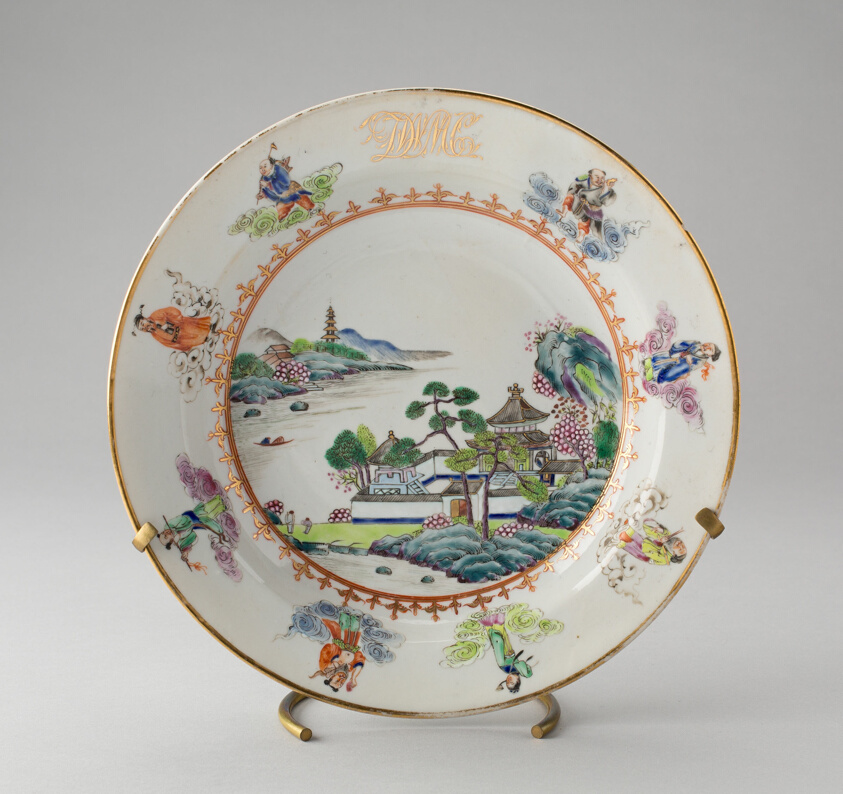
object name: Ceramics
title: Dinner Plate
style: Chinese (culture or style), 18th Century, 19th century, asian, chinese export, East Asian, jiajing, qianlong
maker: China, Qianlong or Jiaqing reign; Chinese, made for the American market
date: 1796–1810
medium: Hard-paste porcelain, glaze, with enamels in colors, and gilding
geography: China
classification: plate (general, dish); porcelain; dish (vessel); American market; chinese export porcelain; art of the americas; ceramics; decorative arts; pottery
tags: architecture, house, immortals, landscape, Monograms, dining, drinking